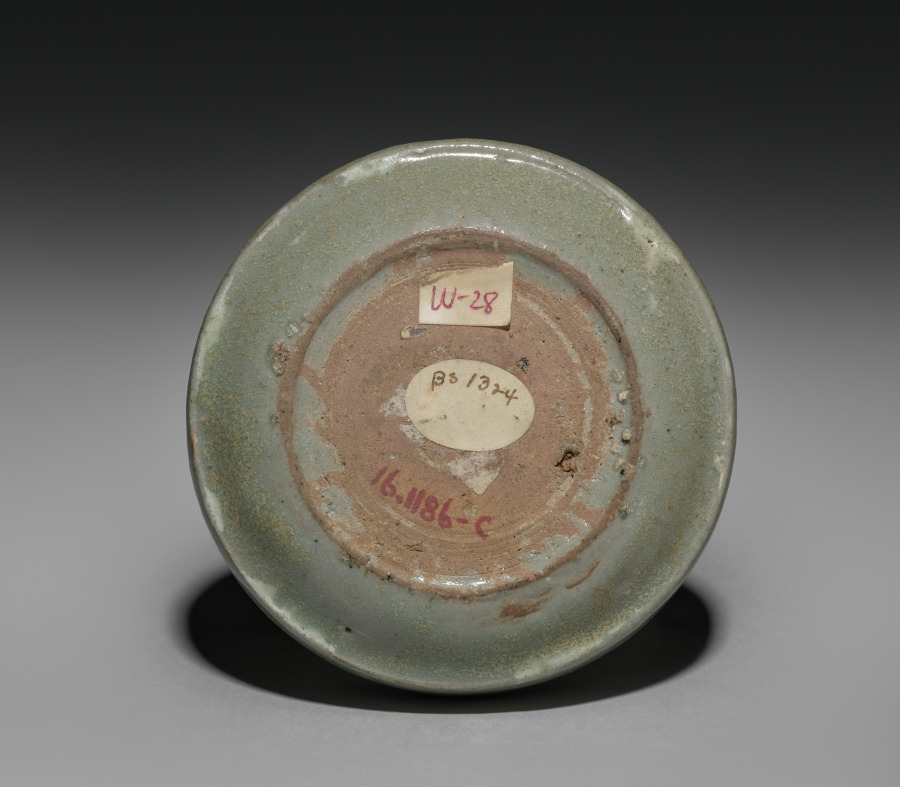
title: Box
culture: Korea, Goryeo dynasty (918–1392)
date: 918–1392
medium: earthenware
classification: Ceramic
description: Celadons, spoons, seals, and bronze mirrors were the most common burial objects in tombs during the Goryeo period (918–1392). Once used to contain colored powder, rouge, and eyebrow gel for makeup, this small container was one of the standard goods that furnished elites' tombs. Both women and men used the grain powder of rice or millet for whitening their skin, safflower extract for rouge, and plant ash or soot for eyebrow gel. Yet, natural-looking makeup seems to have been the most favorable one in Korea according to the travelogue by Xu Jing (1091–1153), the Chinese diplomat who visited Korea in 1123.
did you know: This lidded ceramic container was used to store either incense or cosmetics.